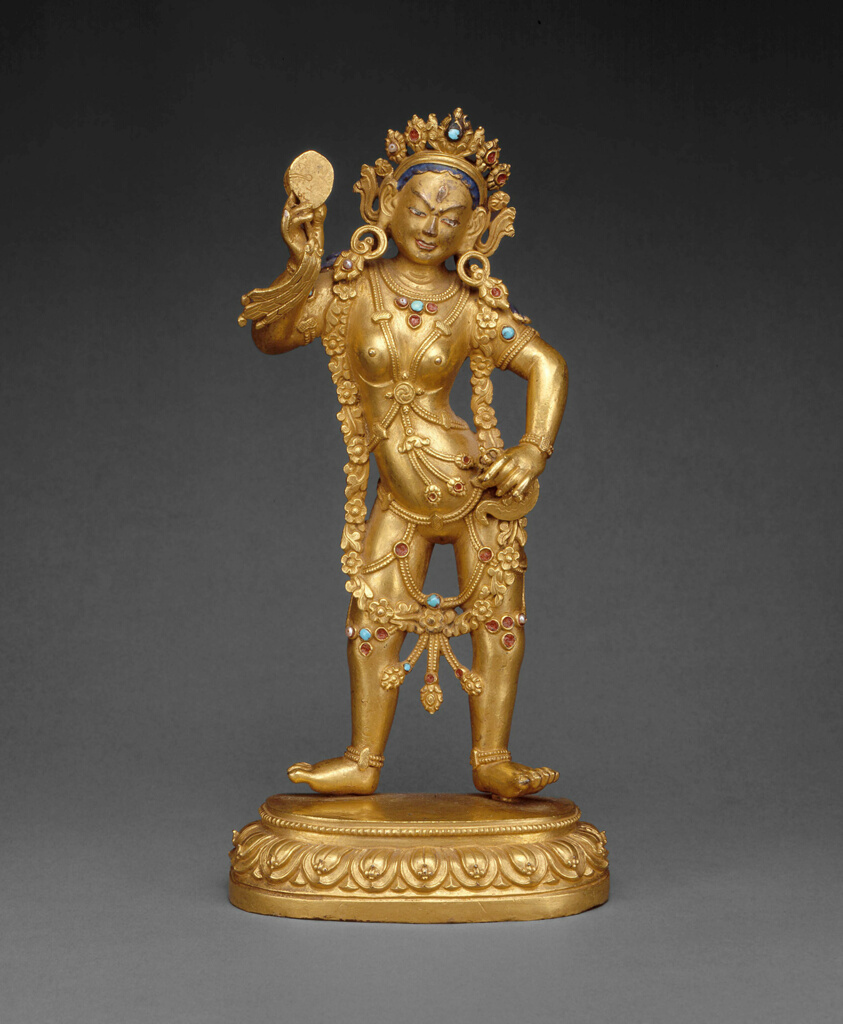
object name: Sculpture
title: Tantric Enlightened Being (Vajrayogini) Queen of Bliss (Dechen Gyalmo)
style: Himalayan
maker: Tibet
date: 18th century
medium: Gilt bronze with gemstones and pigments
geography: Tibet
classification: bronze; metal; sculpture; asian art